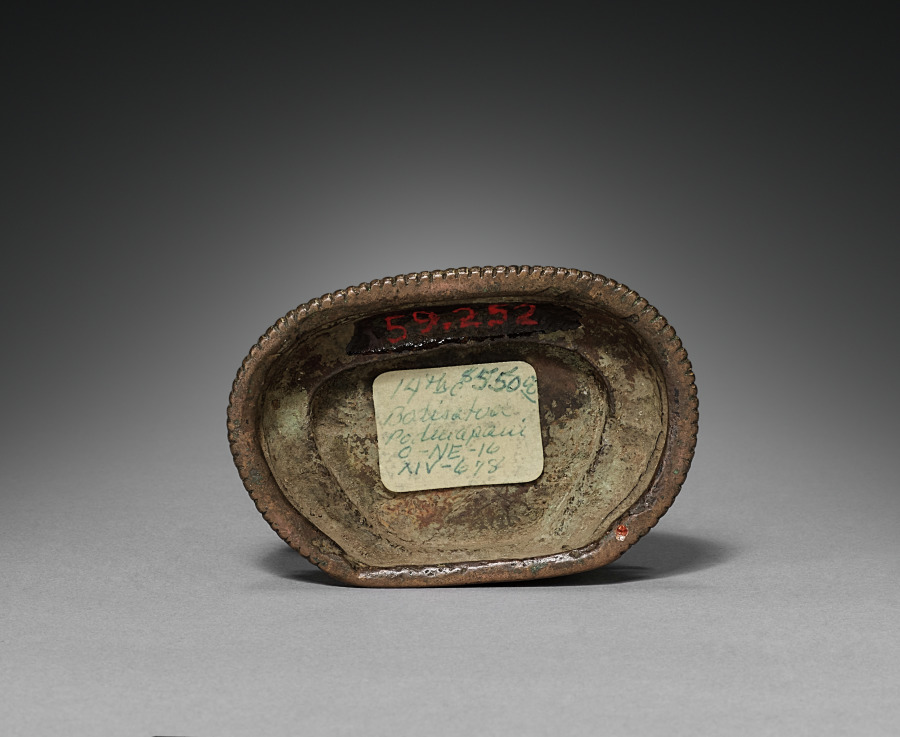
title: Avalokiteshvara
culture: Nepal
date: 1300s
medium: gilt bronze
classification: Sculpture